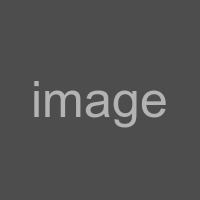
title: Ceylonese Woman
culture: India, 19th century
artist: Scowen & Co. (British, active Ceylon, 1876–1895)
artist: or Skeen & Co. (British, active 1860–1920)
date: c. 1880s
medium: albumen print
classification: Photograph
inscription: Written in pencil on verso: “14”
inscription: Written in pencil on verso: “[illegible handwriting, possibly Jamil]”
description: European photographers took portraits of the people of the colonized nations not for their subjects, but to sell them to governments as information, to tourists as aides memoires, and to “armchair tourists” as aids to the imagination.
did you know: Skeen & Co. and Scowen & Co., the two leading photographic establishments in Ceylon (now Sri Lanka) in the 1880s, rarely signed their work.